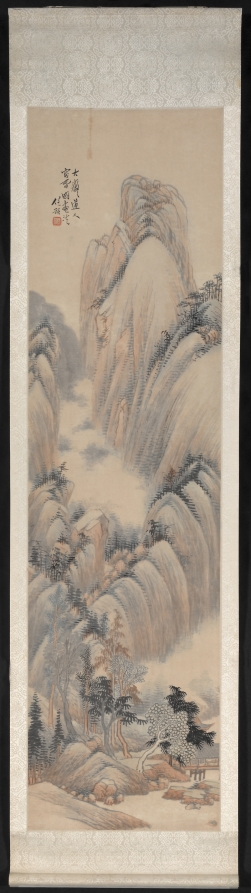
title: Landscape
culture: China, Qing dynasty (1644-1911)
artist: Ren Yu (Chinese, 1853–1901)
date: 1892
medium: Hanging scroll; color on paper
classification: Painting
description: This seasonal landscape is from a set of four hanging scrolls by Ren Yu. He was the youngest, most eccentric, and least prolific of the Four Rens, a family of prominent painters in Shanghai during the late Qing dynasty (1644–1911). Perhaps due to his opium habit and subsequent financial difficulties, Ren Yu tended to be lackadaisical in his work. The few remaining high-quality paintings hint at his artistic potential lost to opium. Though Ren’s premature death left his artistic promise unfulfilled, his paintings were acquired and donated to the museum by Charles Lang Freer (1854–1919), a wealthy businessman and art collector from Detroit. As Freer had hoped, this donation of Ren Yu paintings inspired the young Cleveland Museum of Art to continue to expand its own Chinese painting collection.